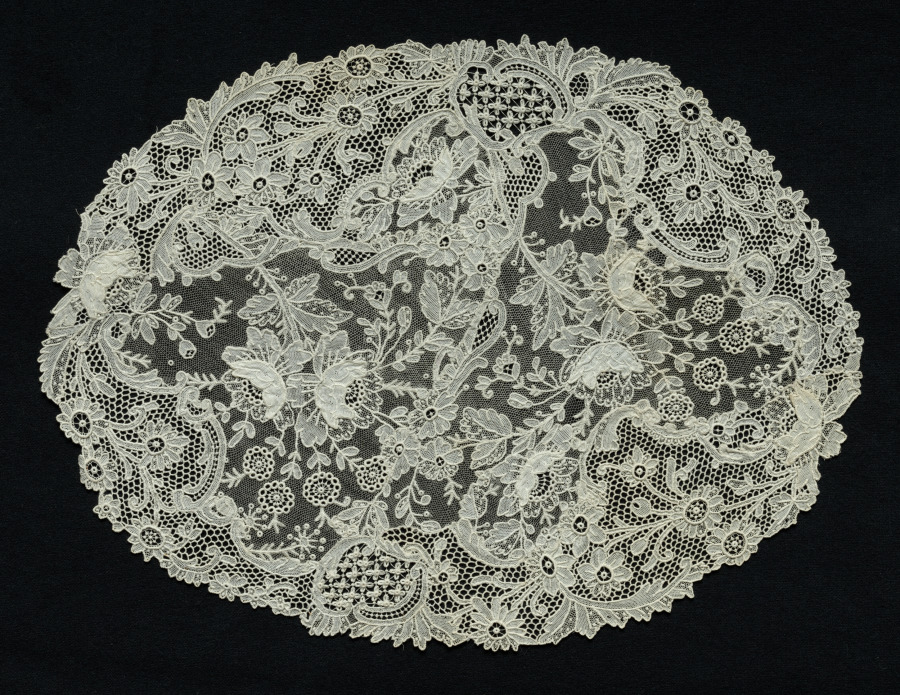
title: Lace Oval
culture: Belgium (Flanders)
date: 1800s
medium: Linen: needle lace (point de gaze)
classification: Lace